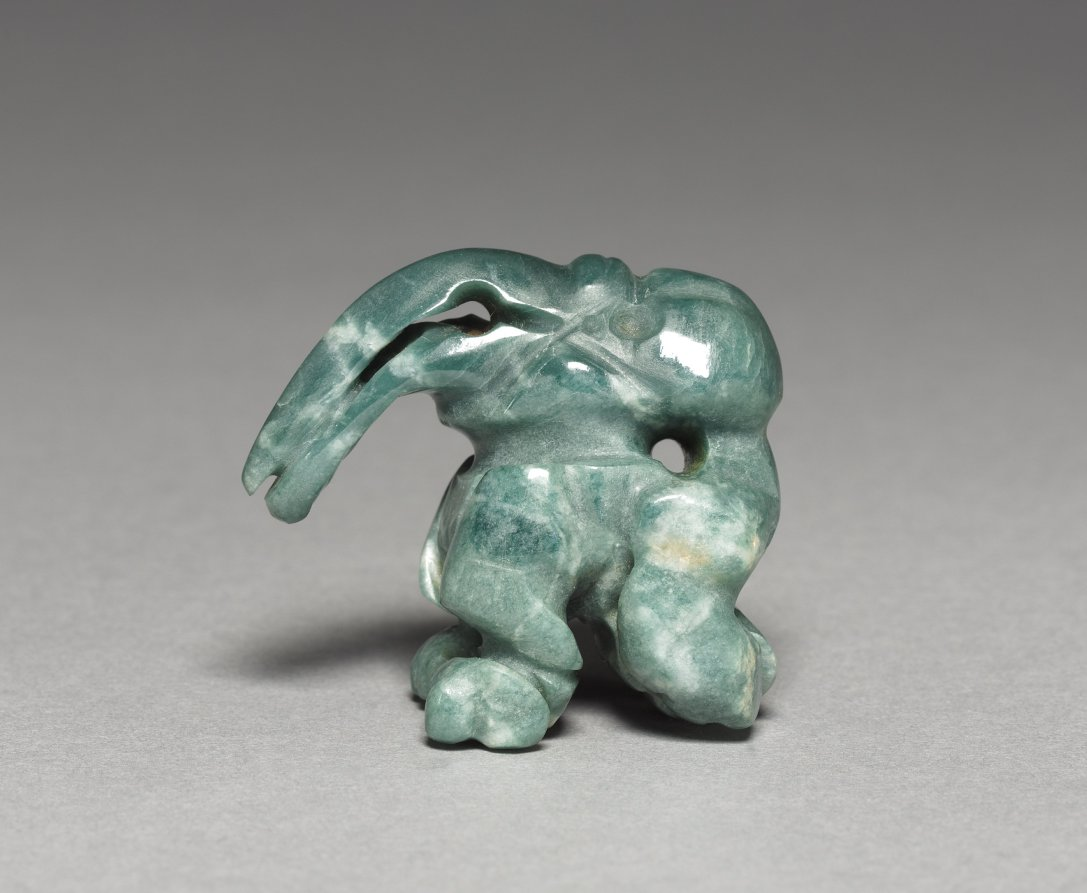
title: Bird Pendant (Buzzard or Vulture?)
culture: Costa Rica, Atlantic Watershed region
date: c. 300 BCE–600 CE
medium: jadeite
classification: Jewelry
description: Before about AD 500, when gold-working technologies were adopted in Costa Rica, jade was the quintessential luxury material and it was masterfully carved into exquisite ornaments of many kinds. Ancient Americans did not use many metal tools, and artists carved jade, a tough stone, with implements of stone, bone, bamboo, or reed.